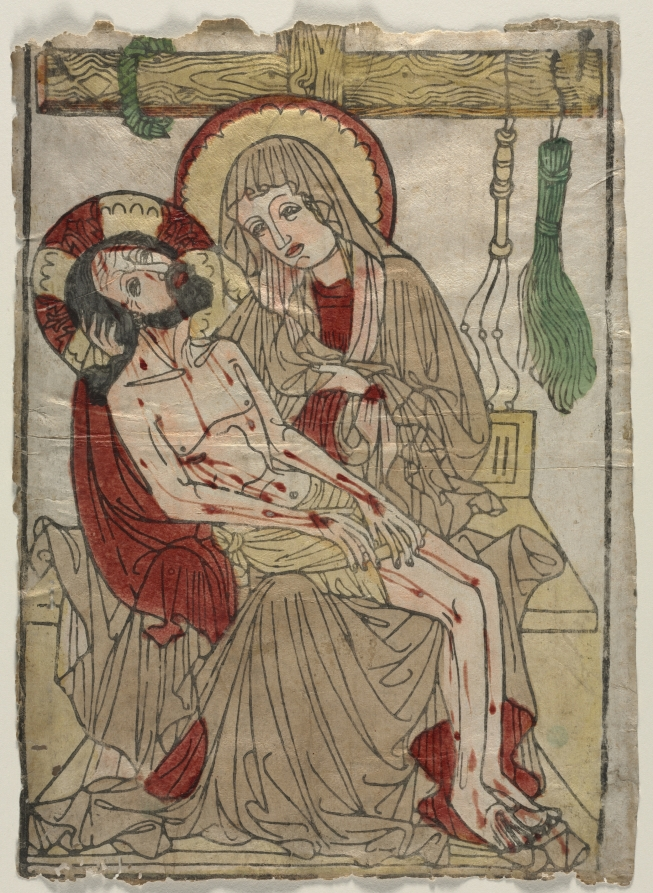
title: Pietà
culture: Southern Germany, Swabia, 15th century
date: c. 1460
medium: woodcut, hand colored with watercolor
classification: Print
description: Early woodcuts usually illustrate religious subjects for the spiritual edification and contemplative meditation of a mostly illiterate public. Produced by anonymous craftsmen, these simple, direct images facilitated an intimate dialogue between the individual and the holy figure depicted. Here, a youthful Virgin Mary delicately embraces her dead son’s body, with its hand-colored flesh and drops of blood. Behind her, the wooden cross displays the Instruments of the Passion of Christ: two nails, the crown of thorns, and two scourges. By stressing the humanity of Mary’s grief over her son’s suffering and death, the print encourages an empathetic response from the beholder. This pietà was probably inspired by sculptures of the subject, common in Germany. Printed on a full sheet of paper, the image was hand colored with watercolor. Remnants of adhesive on the verso and holes caused by insects suggest that it was pasted inside the cover of a book, which preserved it. There are only about 20 northern single-image woodcuts extant. Extraordinary in its large size, fresh color, and good state of preservation, this sheet is the only known impression of the image.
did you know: In this single-leaf woodcut, Mary’s left hand engages her headscarf in a gesture known as the tuchlein-geste, an act anticipating the wiping away of tears.